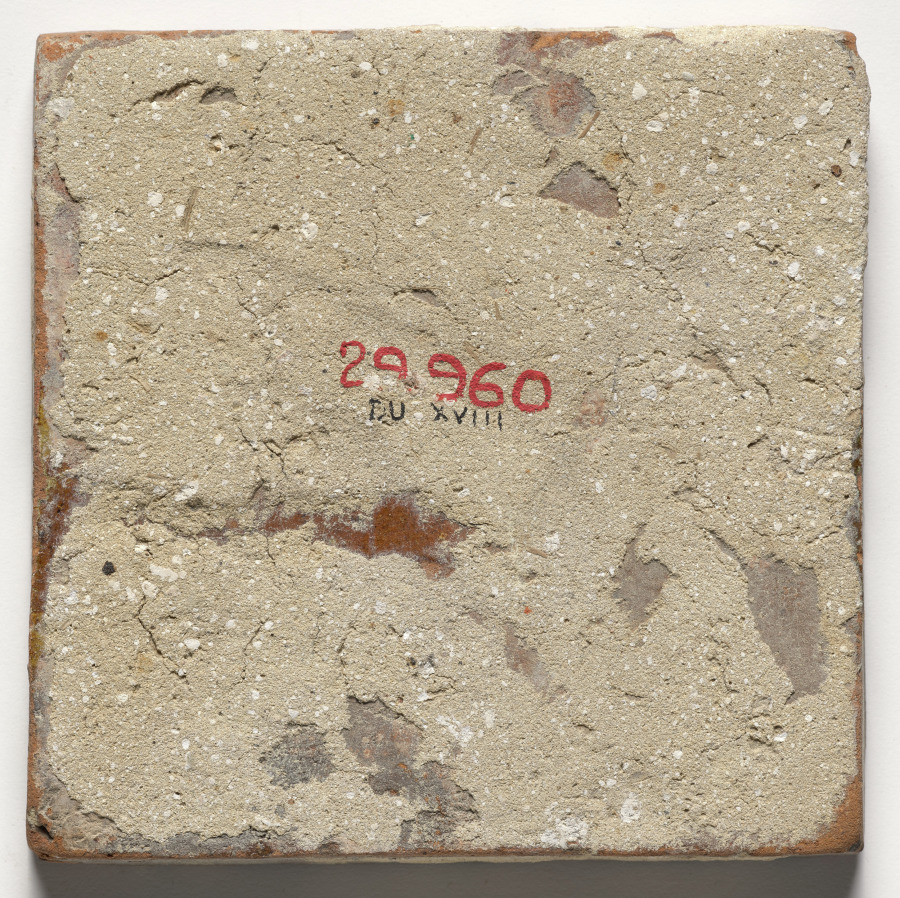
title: Tile- Diamond Interlace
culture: Netherlands, Holland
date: c. 1700s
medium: glazed ceramic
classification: Ceramic